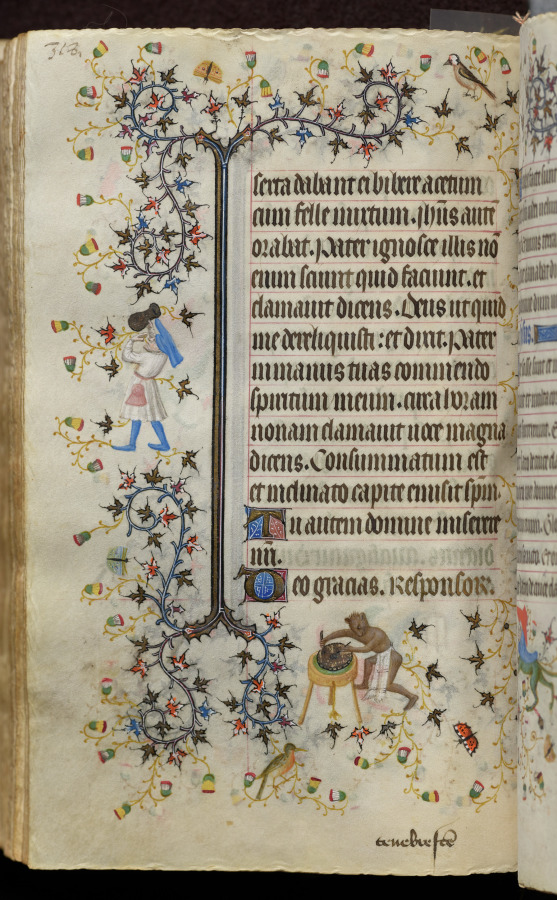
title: Hours of Charles the Noble, King of Navarre (1361-1425): fol. 159v, Text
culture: France, Paris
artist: Master of the Brussels Initials and Associates (French)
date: c. 1405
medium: ink, tempera, and gold on vellum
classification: Bound Volume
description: This precious volume was obviously highly prized by its owner, the French-born King of Navarre, who had his coat of arms painted on no less than twenty folios. Rather than directly commissioning this manuscript from a specific workshop, it seems that Charles the Noble acquired his book of hours -- perhaps ready-made for the luxury market -- while on a trip to Paris in 1404-05. A collaborative effort, six painting styles are evidenced within the pages of this codex, those of two Italians, two Frenchmen, and two Netherlanders. The painter who was responsible for the planning and decoration of the book, and who produced seventeen of the large miniatures, was a Bolognese artist known as the Master of the Brussels Initials. His principal assistant, responsible for most of the borders, was a Florentine who signed his name "Zecho" da Firenze on folio 208 verso.